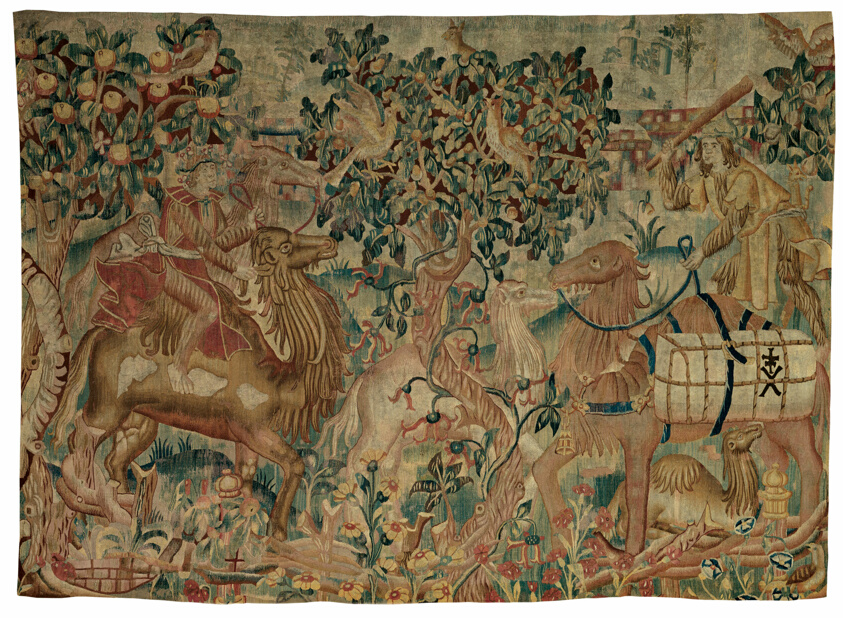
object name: Textile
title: Camel Riders, presumably from a Wild Man series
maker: Franco-Flemish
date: 1475/1510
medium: Wool, slit tapestry weave. Warp: Count: 3–4 warps per cm; wool: S-ply of two Z-spun elements; diameters: 1.0–1.2 mm Weft: Count: varies from 10 to 17 wefts per cm; wool: single S-spun elements; diameters: 0.5–1.2 mm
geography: Flanders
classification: weaving - tapestry; textile